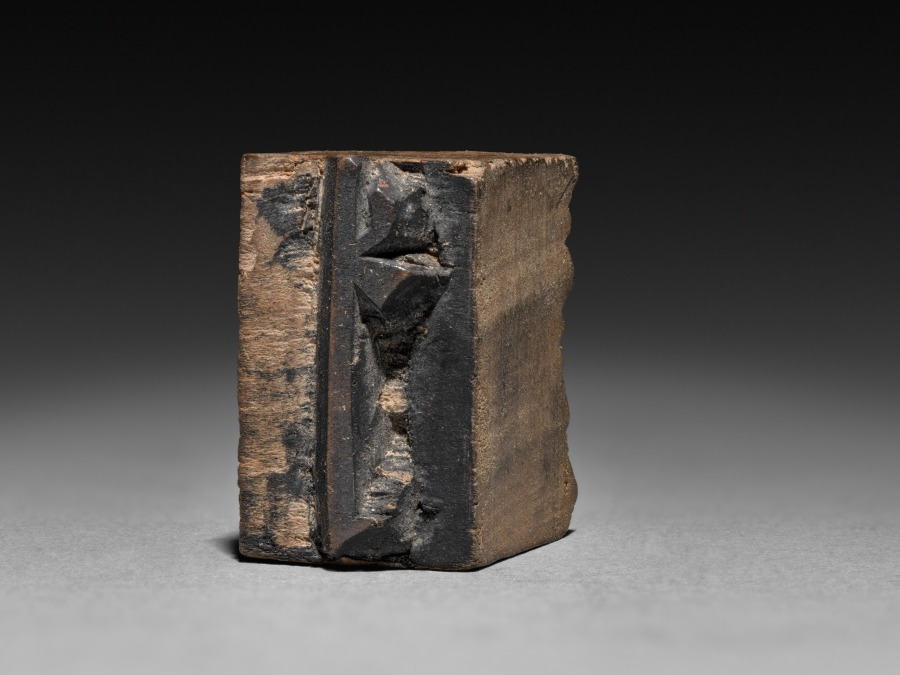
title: Wooden Moveable Type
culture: China, Nigur, 19th century ?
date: probably 1800s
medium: wood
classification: Wood